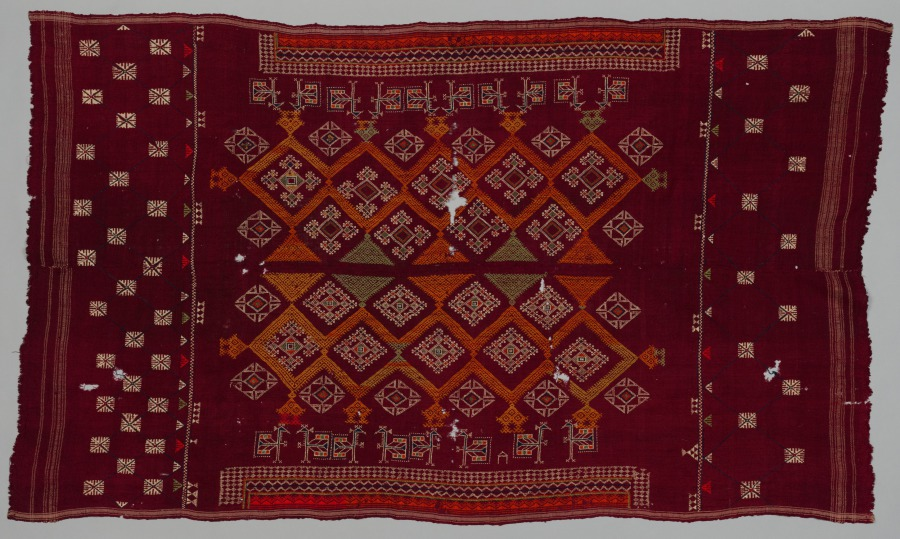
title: Shawl (?)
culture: India, 18th-19th century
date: 1700s - 1800s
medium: embroidery on wool ground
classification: Embroidery